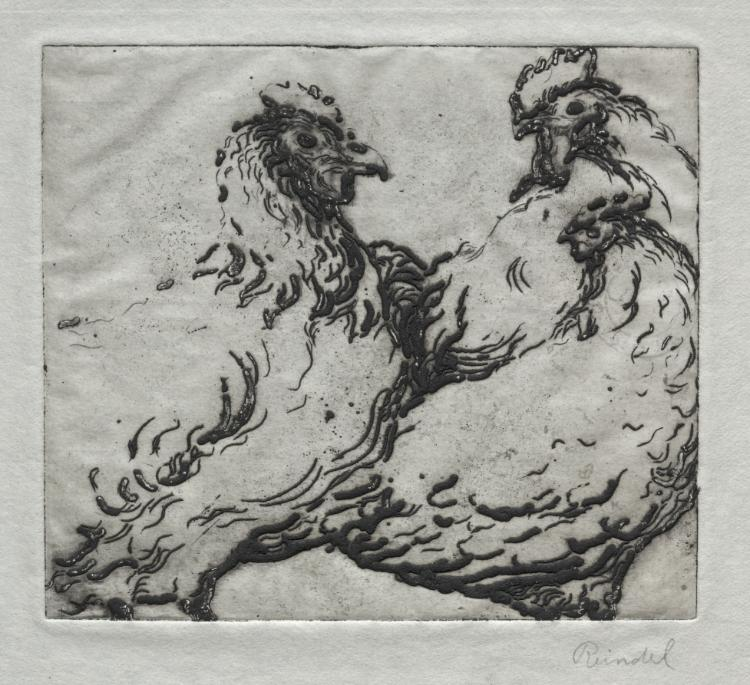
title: Chickens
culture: America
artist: William George Reindel (American, 1871–1948)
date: 1910s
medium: drypoint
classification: Print